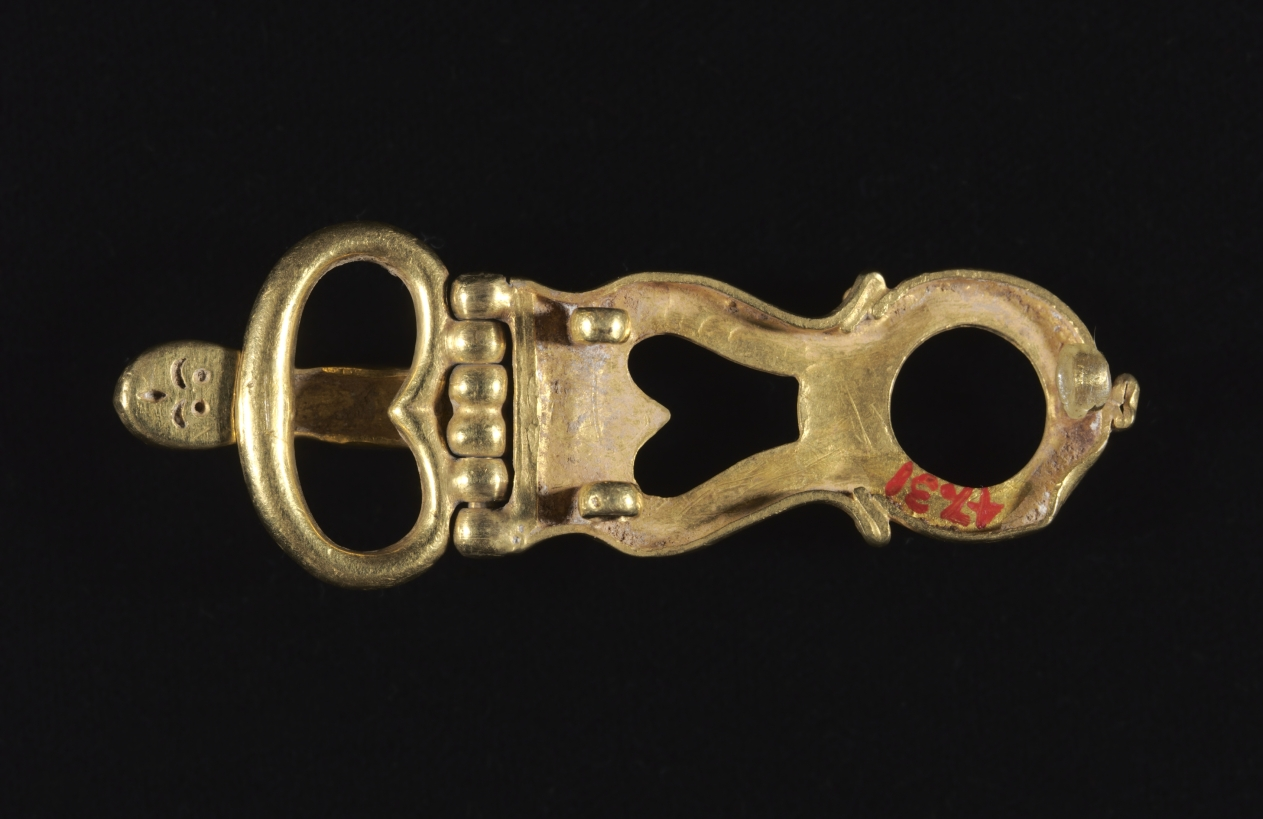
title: Buckle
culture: Byzantium, Avaric, 7th century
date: 600s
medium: gold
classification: Metalwork